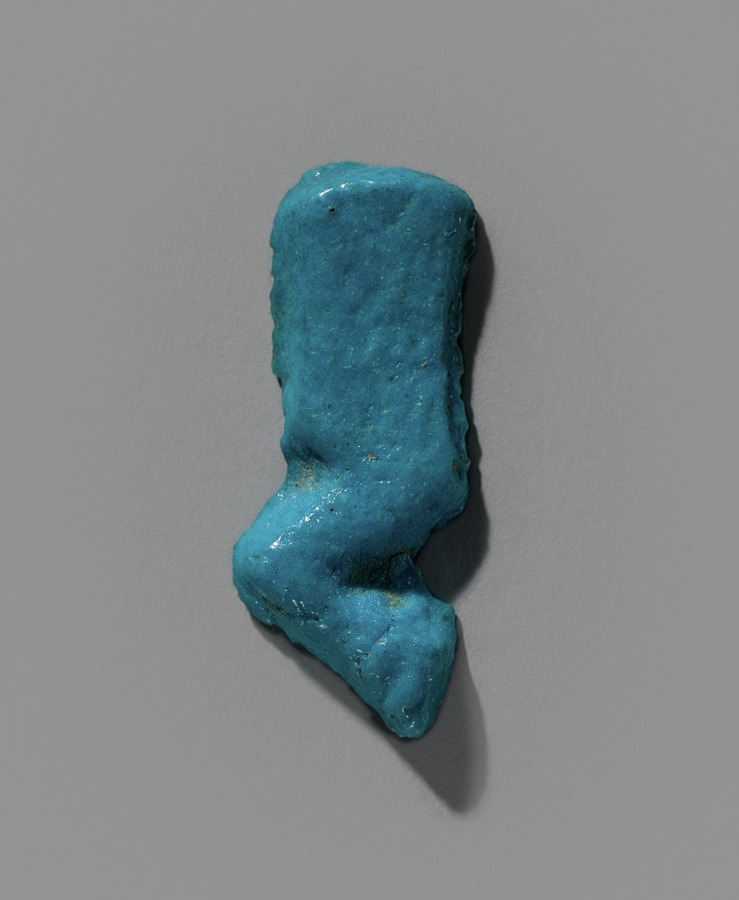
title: Food Model Amulet: Haunch of Meat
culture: Egypt, New Kingdom (1540–1069 BCE), Dynasties 19–20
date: 1295–1069 BCE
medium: turquoise faience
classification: Amulets